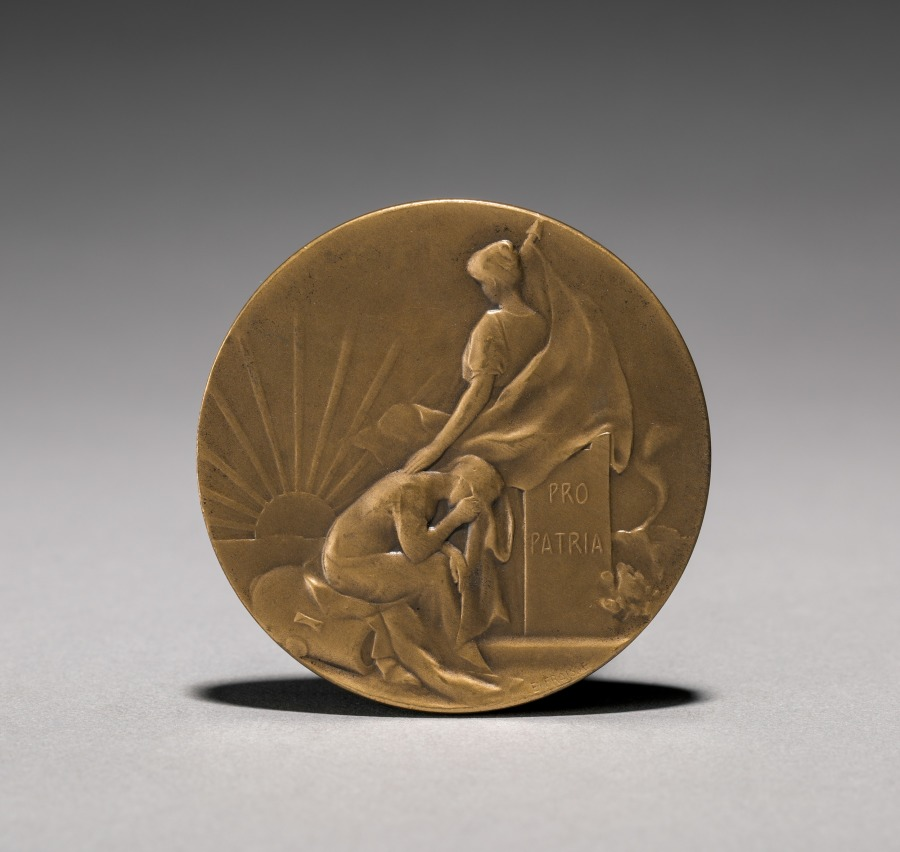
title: Medallion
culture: France, 20th century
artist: Edouard Fraisse (French, 1880–1945)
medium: bronze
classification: Metalwork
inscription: "Pro Patria" (for the fatherland); signed: "E. Fraisse."